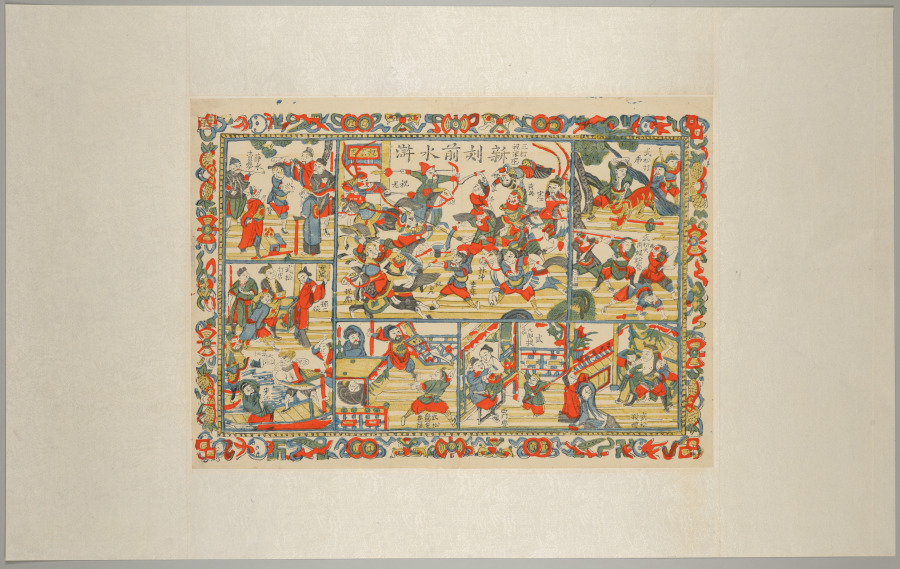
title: A Newly Cut Print: Scenes from the First Part of Outlaws of the Marsh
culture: China, Qing dynasty (1644–1911), Jiaqing period (1796–1820)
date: 1796–1820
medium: Polychrome woodblock print; ink and color on paper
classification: Print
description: In the 1600s, printing flourished in such Jiangnan cities as Nanjing, Suzhou, Hangzhou, and Huizhou, evolving from privately enjoyed illustrated books printed in color to more commercialized single-sheet color prints that were hung on walls and became part of the rich urban visual culture.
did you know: Woodblock printing in color reached a height in China in the 1600s to 1700s. The prints were executed by means of sets of separate blocks, each carved to print a different color.